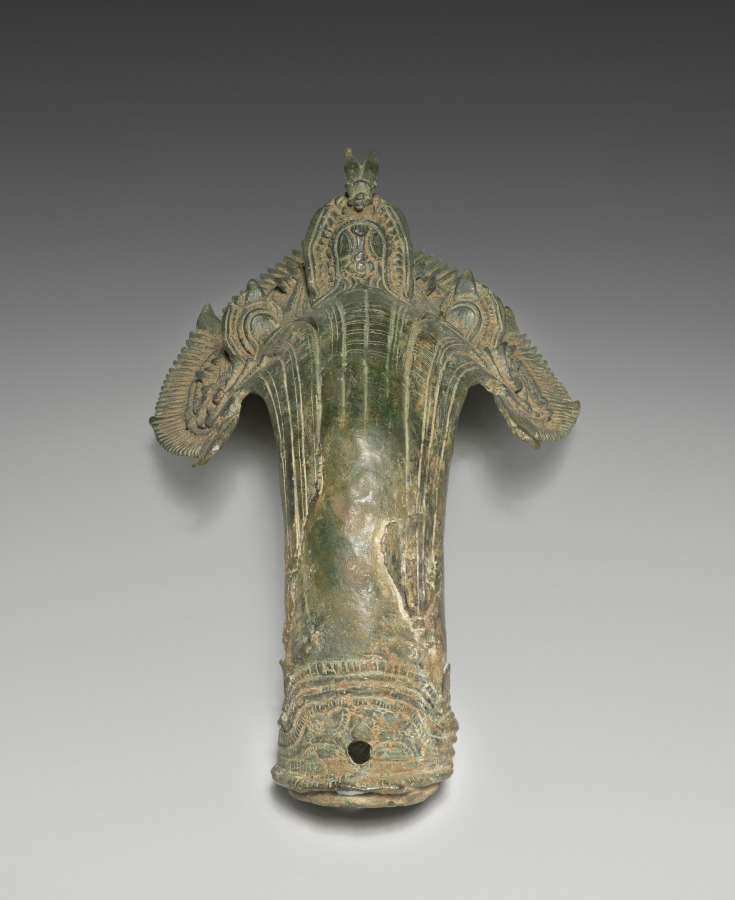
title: Naga Finial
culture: Cambodia, Angkor Wat Period, 12th century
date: 1100s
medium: bronze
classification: Metalwork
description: When members of the royal family or priesthood traveled in a public festival procession or to a temple to make offerings or participate in a ceremony, they would be carried in a palanquin, or a covered litter. Portable objects of veneration, such as bronze images or a sacred fire, were also carried on palanquins. The palanquins had wooden poles, hanging seats or raised platforms, and bronze fittings cast in intricate forms and gilt, lending the palanquins a sumptuous quality. The royal palanquins were typically fitted with multiheaded, serpent-shaped finials at the ends of the poles and corners of the elevated platforms. Naga means serpent in Sanskrit, a language from India selectively appropriated by the Khmer in Cambodia. In their own indigenous mythology, the Khmer people trace their descent from a naga princess and a prince from the island of Java who journeyed to Cambodia. The naga remains a potent emblem for the Khmer nation to this day; it is ubiquitous on Cambodian monuments.